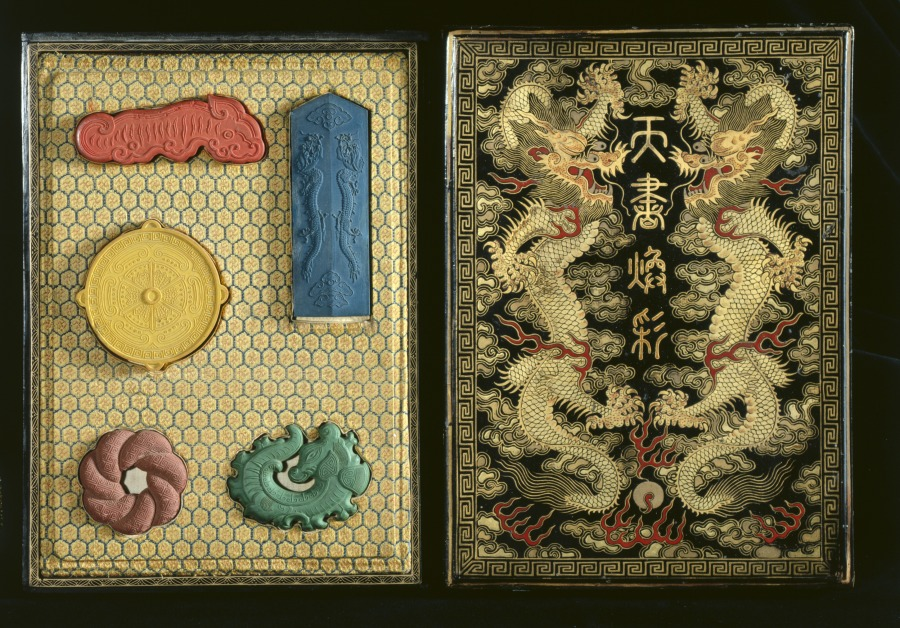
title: Box with Ink Cakes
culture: China, Qing dynasty (1644-1911), Jiaqing reign (1795-1820)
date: 1795–1820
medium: Lacquer and silk box; molded ink in red, yellow, blue, and green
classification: Lacquer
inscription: 江西巡撫臣陳淮恭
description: Ink cakes (also called ink sticks) are dissolved with the addition of water and then ground on the surface of a flat square stone into liquid ink for painting and calligraphy. The precious ink cakes here, however, have never been used. The inscription on the side of the blue Gui scepter-shaped ink cake says that the set was commissioned by Chen Huai, Governor of Jiangxi province. The green and bright red ink cakes take the forms of archaic dragons. The dull red ink cake resembles a brocade knot. The yellow cake shaped like the Buddhist "Wheel of the Law" is inscribed on the reverse.